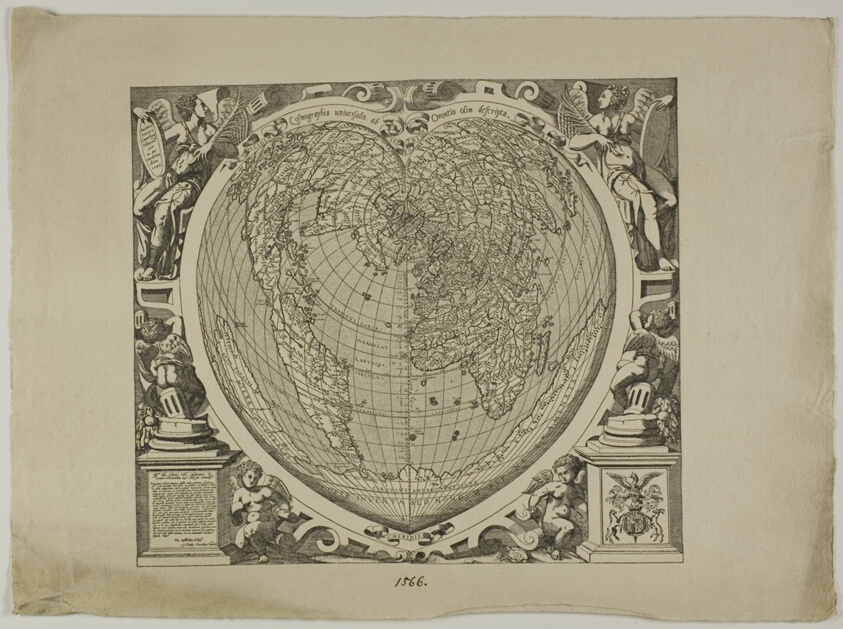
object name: Print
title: Map of the World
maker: Unknown Artist (English, 19th century); after John Paul Cimerlin (Italian, active c. 1566)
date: 1889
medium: Engraving in black on paper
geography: England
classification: reproduction; print; prints and drawing